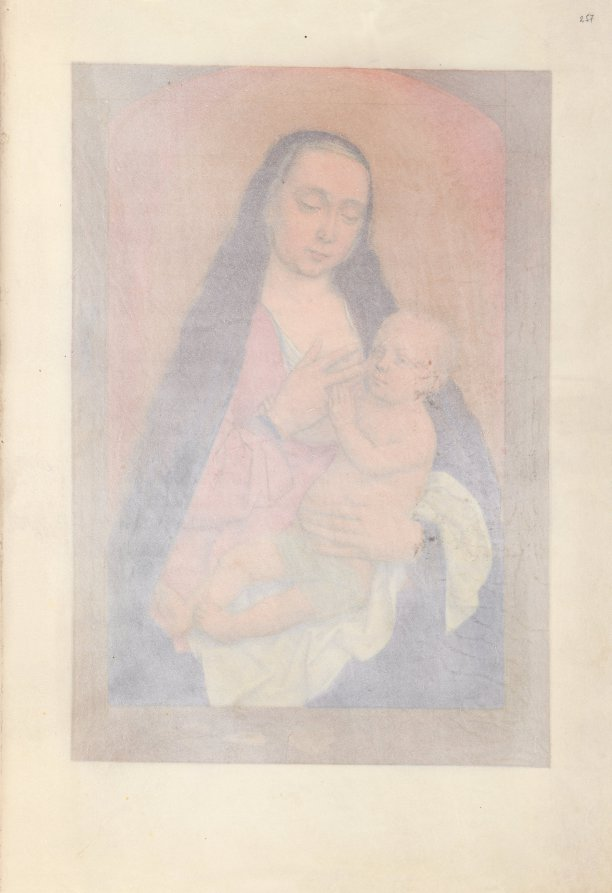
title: Hours of Queen Isabella the Catholic, Queen of Spain: Fol. 257r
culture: Flanders, Ghent and Bruges, late 15th century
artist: Master of the First Prayerbook of Maximillian (Flemish, c. 1444–1519)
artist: and Associates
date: c. 1500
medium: ink, tempera, and gold on vellum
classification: Bound Volume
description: This manuscript was illuminated by a circle of at least five highly organized manuscript painters active in the Flemish cities of Ghent and Bruges. The principal illuminator was Alexander Bening, who painted the majority of the book's miniatures. Manuscripts produced by this circle of artists are renowned for the decoration of their borders, which typically feature a rich variety of realistically-painted flowers, birds, and butterflies. This prayer book, called a book of hours, was intended not for a cleric, but for the private devotions of a lay person-in this case, Isabella the Catholic, Queen of Spain (1451-1504). Isabella's coat of arms embellishes the book's frontispiece. It is unlikely that the book was commissioned by the Queen herself; rather, she probably received it as a diplomatic gift from someone courting her patronage, perhaps Cardinal Francisco Jimenez de Cisneros. A Franciscan friar, Jimenez was dependent upon Isabella for his advancement, first to the post of Queen's confessor in 1492, and then to Archbishop of Toledo in 1495.